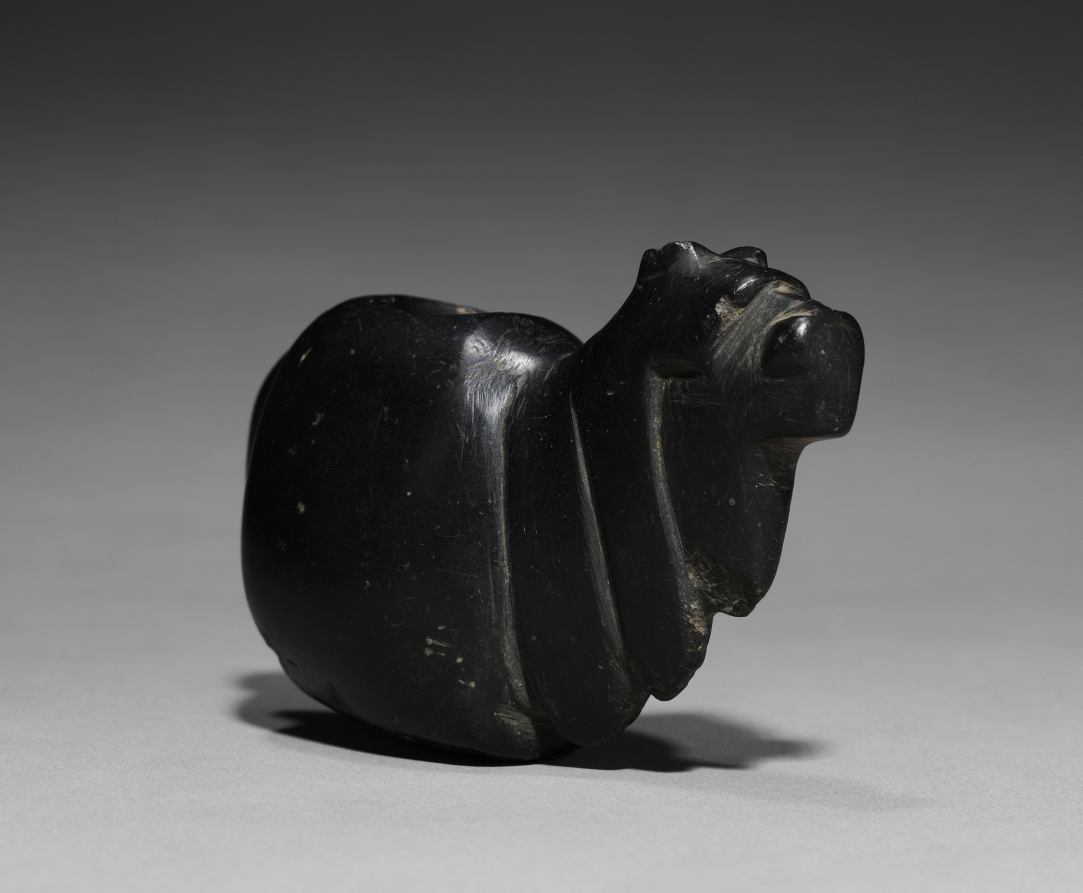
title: Alpaca Offering Container (Canopa)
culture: Peru, Inka style (1400-1532)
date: 1400–1532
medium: stone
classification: Stone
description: An unknown substance was placed in the back cavity of this alpaca before it was buried as an offering.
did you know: This stone llama was an offering buried to ensure health and fertility for domestic animals.